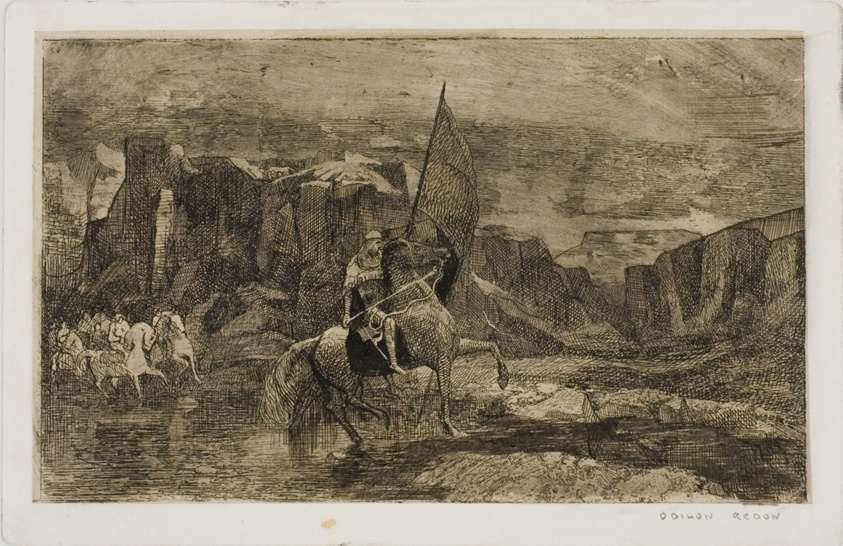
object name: Print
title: Standard Bearer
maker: Odilon Redon (French, 1840-1916)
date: 1868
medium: Etching and drypoint, heightened with pen and black and brown ink, on mounted tan China paper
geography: France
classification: etching; print; prints and drawing; paper